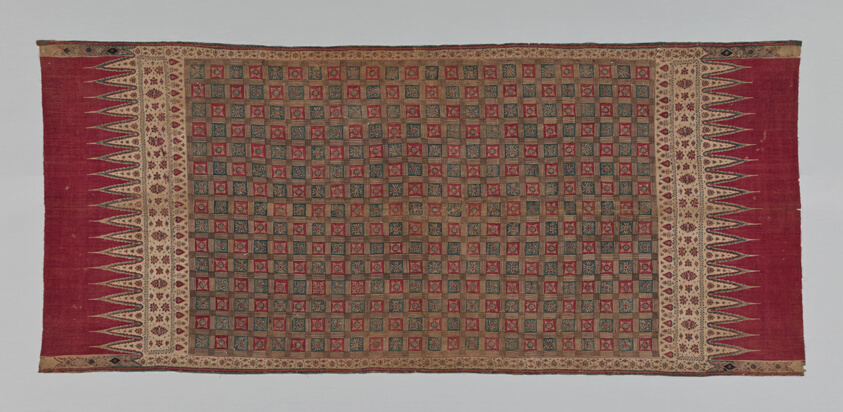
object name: Religious/Ritual Object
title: Ceremonial Cloth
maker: India; Found in South Sumatra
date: 17th/18th century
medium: Cotton, plain weave; block printed, resist-dyed; both selvages present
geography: India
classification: textile; weaving - printed; weaving; ritual objects